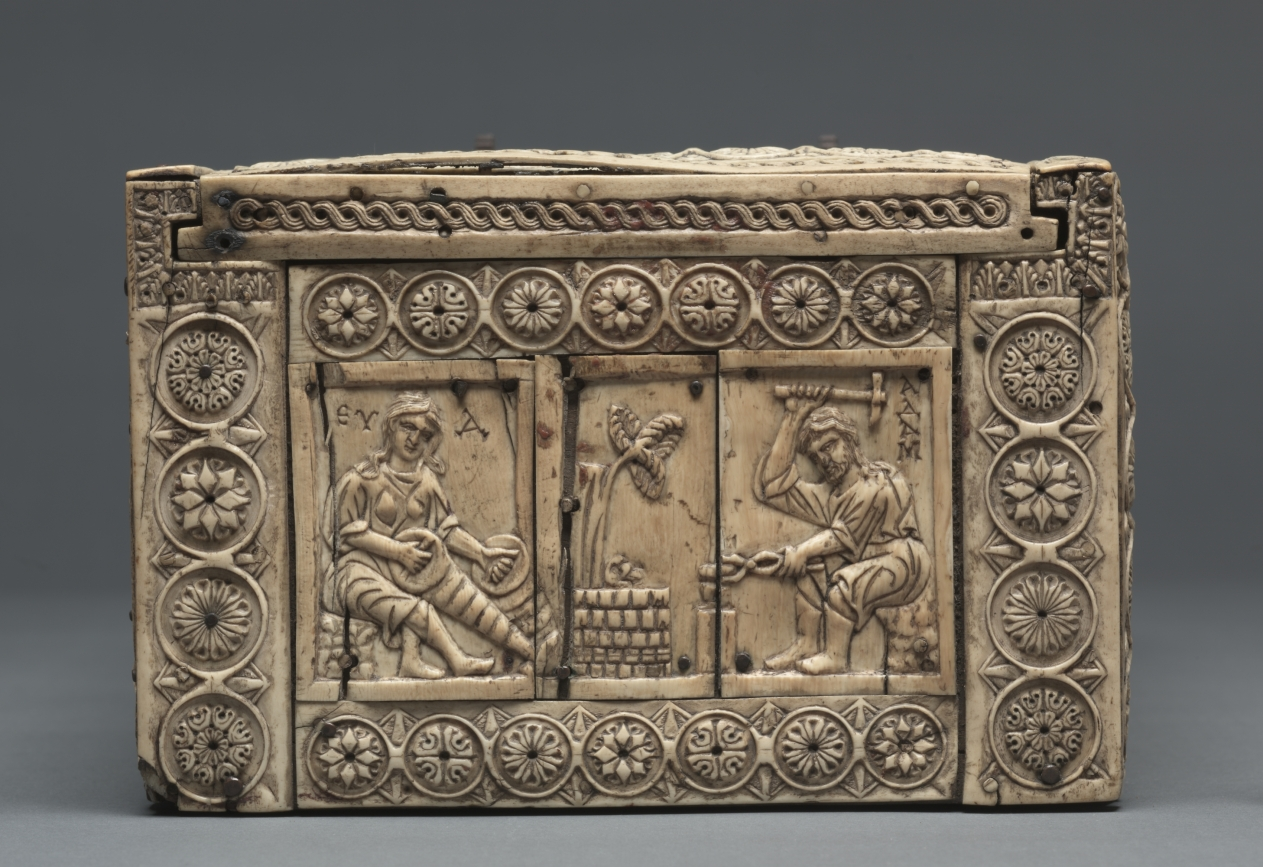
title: Ivory Box with Scenes of Adam and Eve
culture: Byzantium, Constantinople, Byzantine period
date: 1000–1100s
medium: ivory, wood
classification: Ivory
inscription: Greek inscriptions are included in each plaque.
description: Scenes from the Old Testament stories of Adam and Eve and their children, Cain and Abel, decorate this box, which may have been made to contain jewelry or small valuables. On its lid two plaques depict the creation of Adam and the creation of Eve from Adam’s rib. Two further plaques depict Cain slaying Abel: Cain throws a stone in the direction of Abel, who is hit by stones in the hip, chest, and head.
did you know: Carved out of imported ivory by skilled craftsmen, boxes such as these were used by Byzantine elites to store luxury goods such as jewelry.